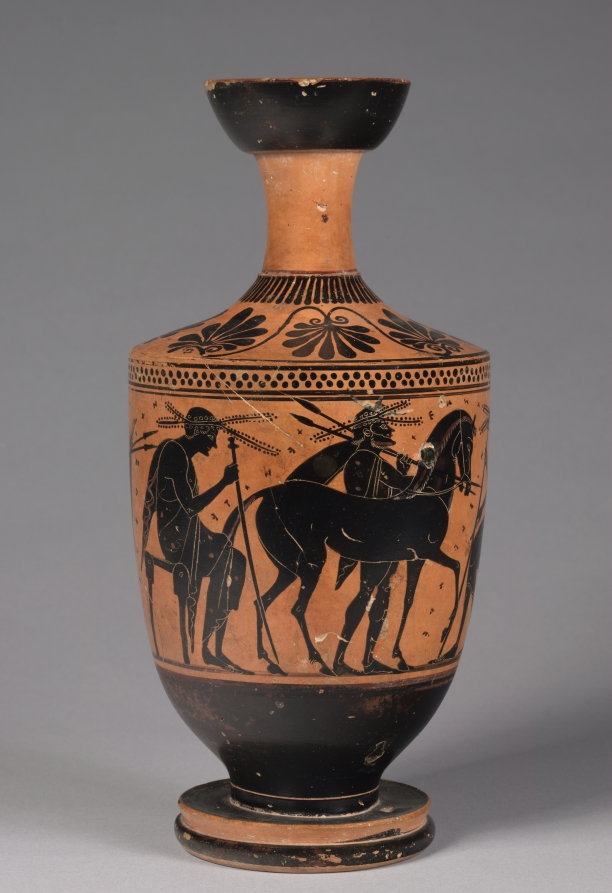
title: Black-Figure Lekythos (Oil Vessel): Seated Men, Warriors and Horse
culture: Greek, Attic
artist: attributed to Leagros Group (Greek, Attic, active c. 520–500 BCE)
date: c. 510–500 BCE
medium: ceramic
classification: Ceramic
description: Four men decorate the body of this sturdy oil vessel, perhaps in a scene of homecoming. Unlike on later, white-ground lekythoi, the painter has used white only as an accent—now faded—on the shield and the clothing and broad-brimmed hats of some of the men. The letters scattered across the background do not spell any recognizable Greek words, perhaps suggesting an illiterate painter and/or clientele.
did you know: As usual for lekythoi painted by the Leagros Group, seven palmettes decorate the shoulder.